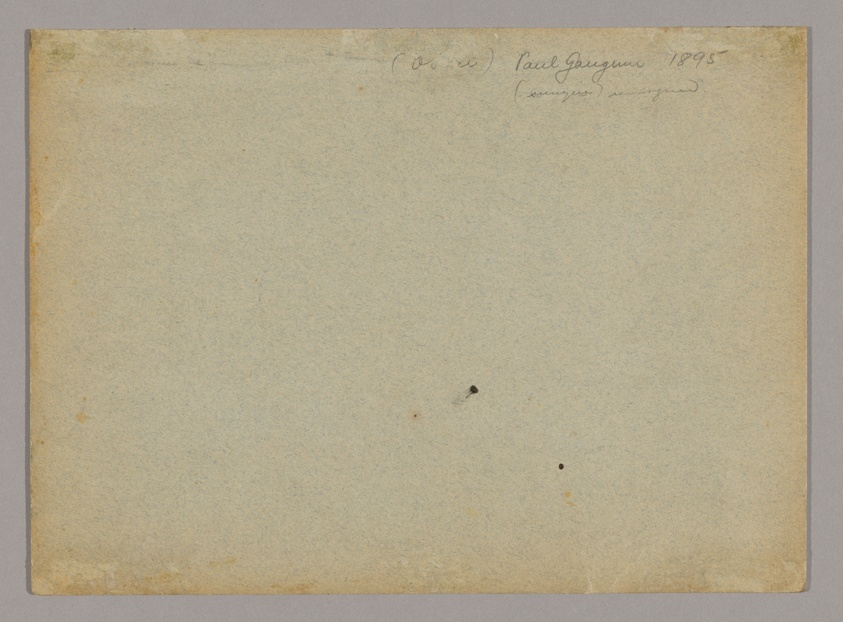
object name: Print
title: Oviri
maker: Paul Gauguin (French, 1848-1903)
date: 1894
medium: Wood-block print, printed twice in deep-yellow ocher and black ink, on cream wove paper (an imitation Japanese vellum), mounted on mottled blue wove laminate card (recto); wood-block print in black ink over red ink tone block, and brush and solvent-thinned orange wash, on cream wove paper (an imitation Japanese vellum) mounted on mottled blue wove laminate card (verso)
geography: France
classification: woodcut; print; prints and drawing